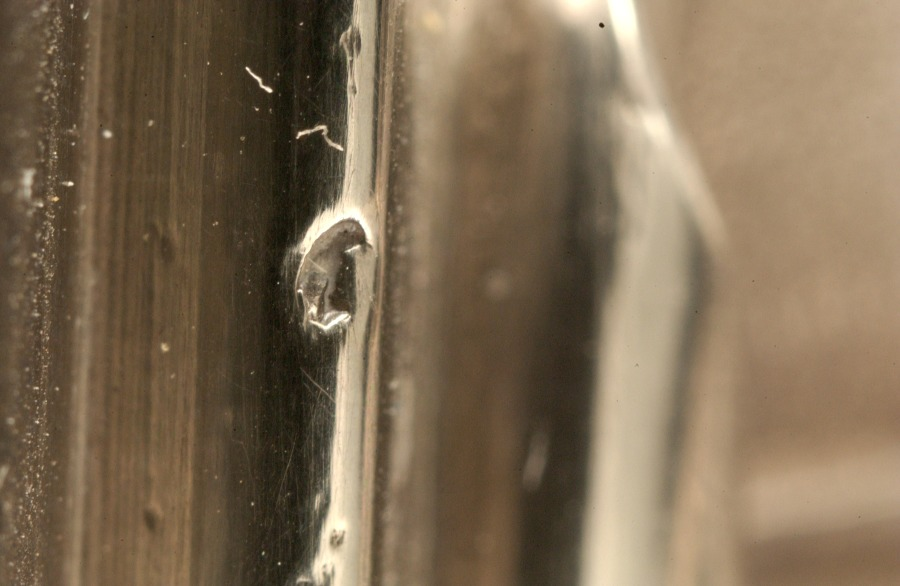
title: Covered Tureen on Stand (Pot à oille)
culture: France, late 18th-early 19th Century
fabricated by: Henry Auguste (French, 1759–1816)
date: 1797–98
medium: silver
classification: Silver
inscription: [Coat-of-arms of Amoral don Federico Carlos Gravina on bowl; cover; stand]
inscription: [Assay mark for large-sized work, 1798-1809, lining exterior; tureen foot exterior]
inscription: [Assay mark for medium-sized work, 1798-1809, beneath stand foot; on edge of cover]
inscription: [Maker's mark of Henri Auguste, master silversmith in 1785, beneath tureen foot; beneath stand foot; inside stand foot edge]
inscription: [Official assay mark for first standard silver, Paris, 1798-1809, beneath stand foot; lining exterior; on cover]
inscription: [Official mark for silver imported from countries with customs conventions, 1838-1912, beneath stand foot; edge of cover; tureen lip exterior; lining exterior; on one tureen handle; outside stand foot; tureen foot exterior]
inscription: [Unknown mark, possibly Ceres' profile in square with "E" and "7", beneath stand foot; on cover; rim of lining; tureen foot exterior; tureen lip exterior]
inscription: [Unofficial assay mark for first standard silver, Paris, 1794-1797, beneath foot stand; beneath tureen foot; near tureen handle exterior]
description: This pot-à-oille was designed by master goldsmith Henri Auguste after drawings by draftsman and sculptor Jean Guillaume Moitte. Though many of the neoclassical decorative elements on this piece are pulled from Moitte’s design, Auguste’s final product leaves out much of the proposed ornamentation. Instead this object finds distinction in its large size and smooth expanses of silver that emphasize the purity of its lines.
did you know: The coat of arms on the body of the work corresponds to the family of Federico Carlos Gravina, a Sicilian-Spanish admiral who was known to have had a close diplomatic relationship with Napoleon I.